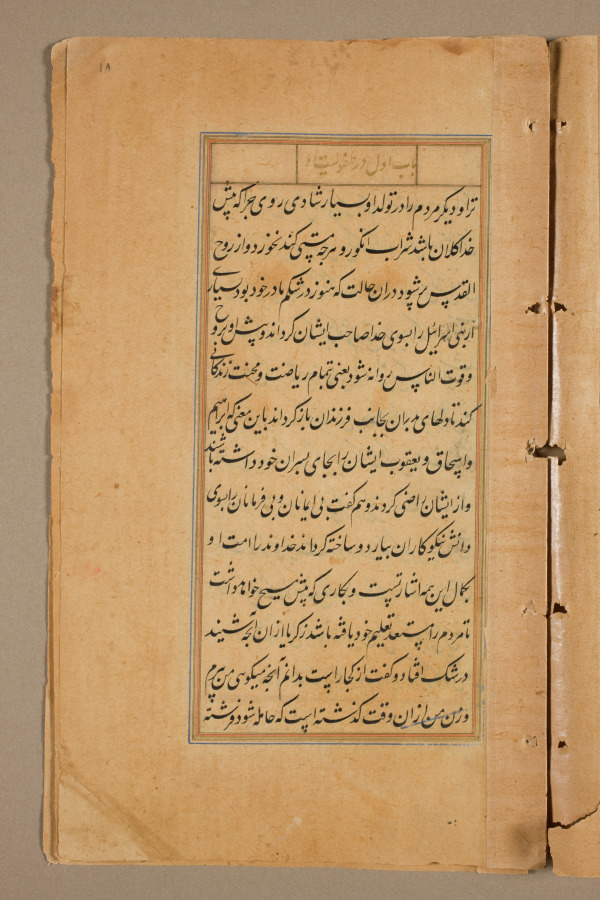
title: Text page from a Mirror of Holiness (Mir’at al-quds) of Father Jerome Xavier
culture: Mughal India, Allahabad, made for Prince Salim (1569–1627)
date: 1602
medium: Ink and gold on paper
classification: Manuscript